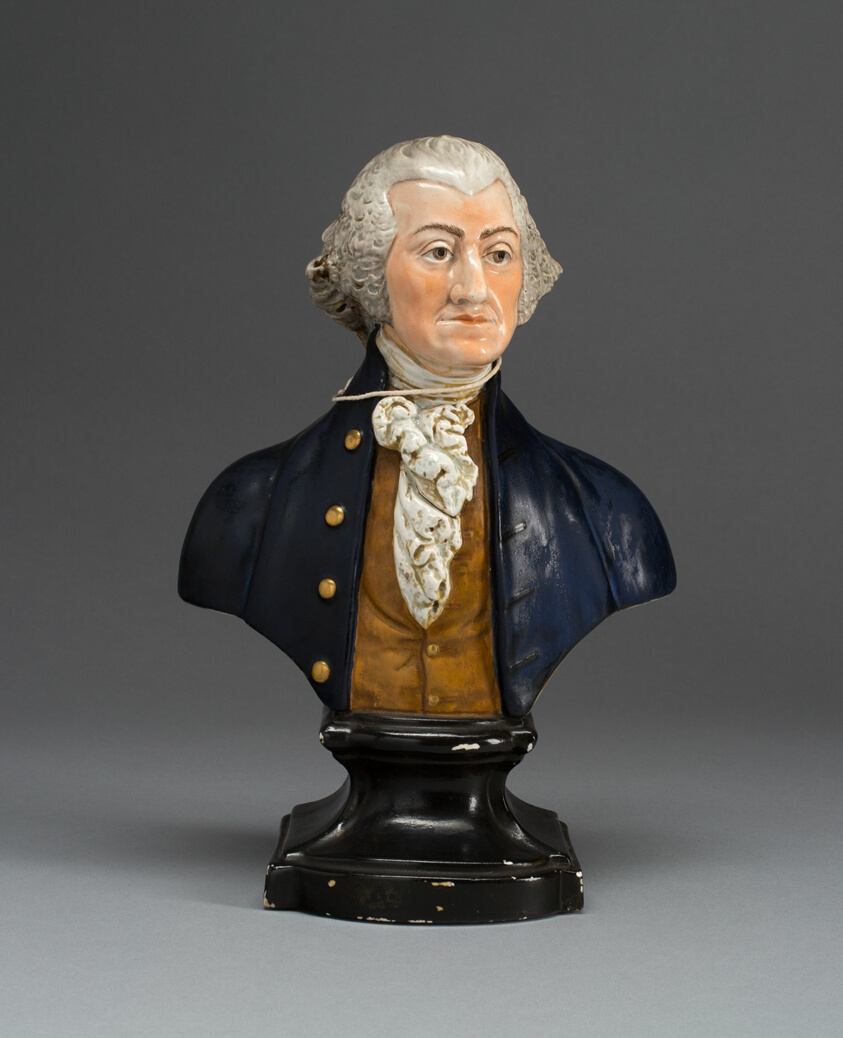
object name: Decorative Arts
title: Bust of Washington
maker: Enoch Wood & Sons; English, 1818–1846; English for the American market; Burslem, England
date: 1818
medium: Earthenware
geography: Burslem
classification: sculpture; american decorative arts; porcelain; european decorative arts; ceramics; decorative arts